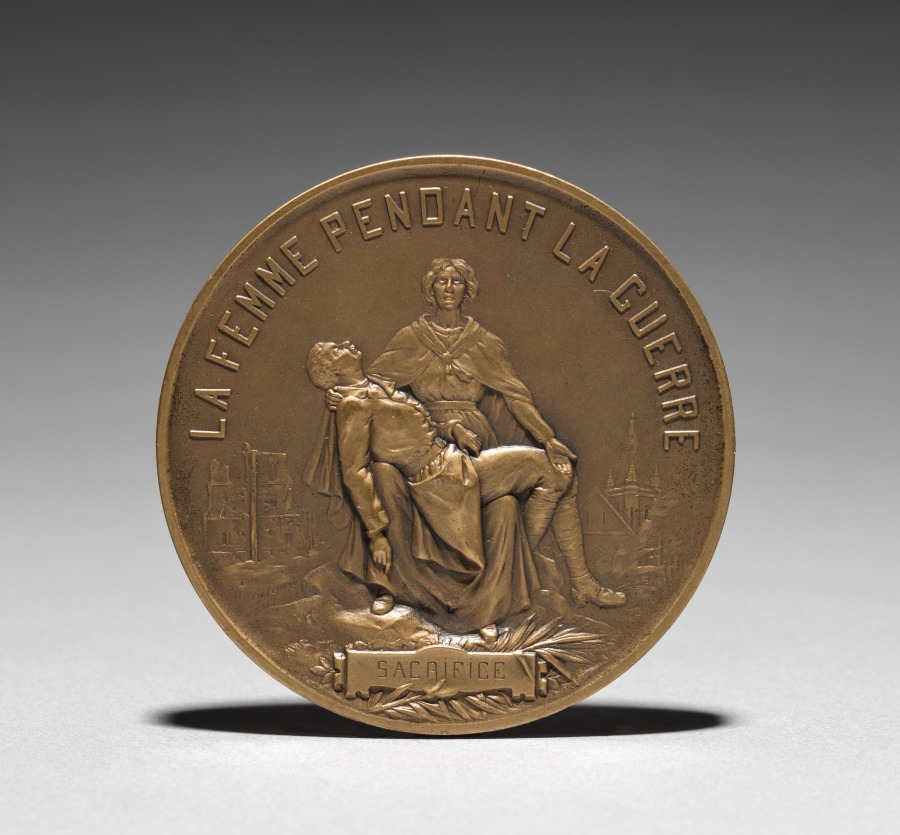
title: Medallion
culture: France, 19th-20th century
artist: Henri Emile Allouard (French, 1844–1929)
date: 1918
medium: bronze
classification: Metalwork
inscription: "Sacrifice. La femme pendant la Guerre" (woman during the war); signed: "H. Allouard 1918."